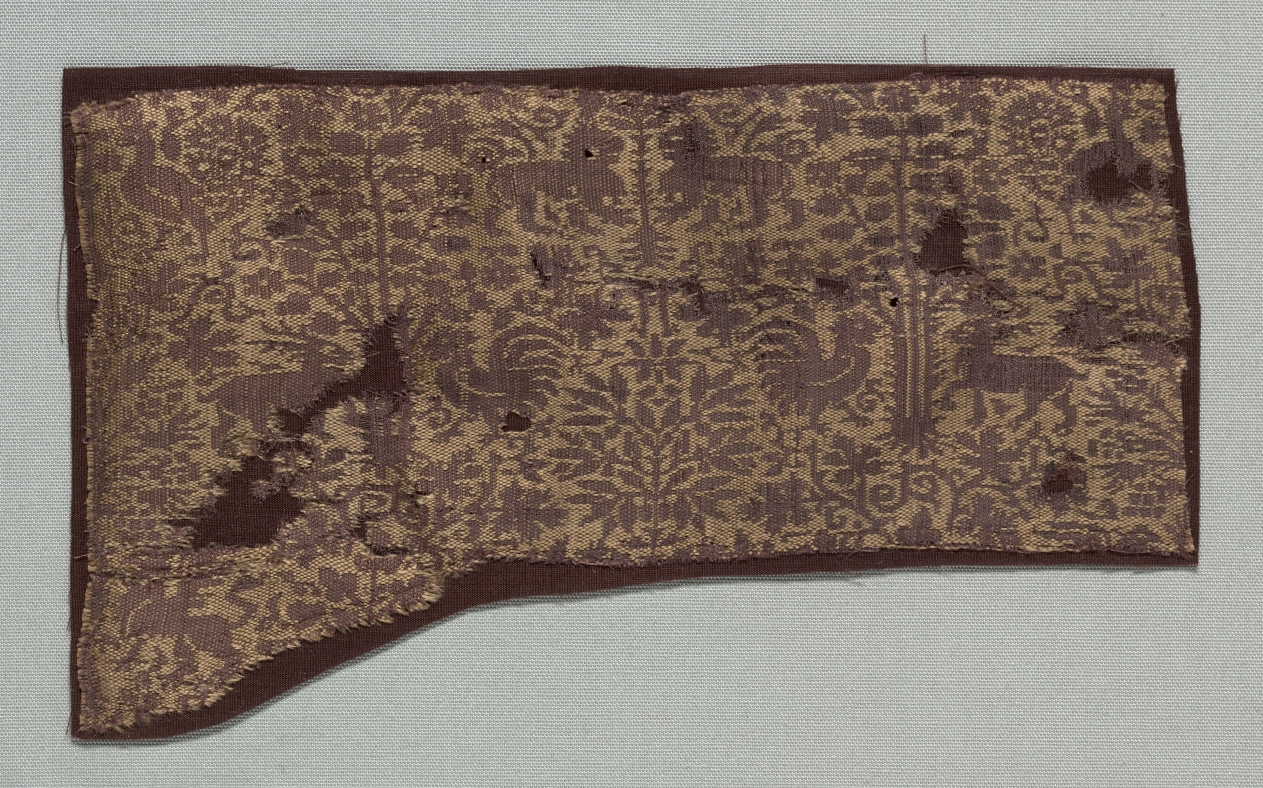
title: Fragment with Small-Scale Design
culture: Italy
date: c. 1360–90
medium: silk: lampas weave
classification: Textile